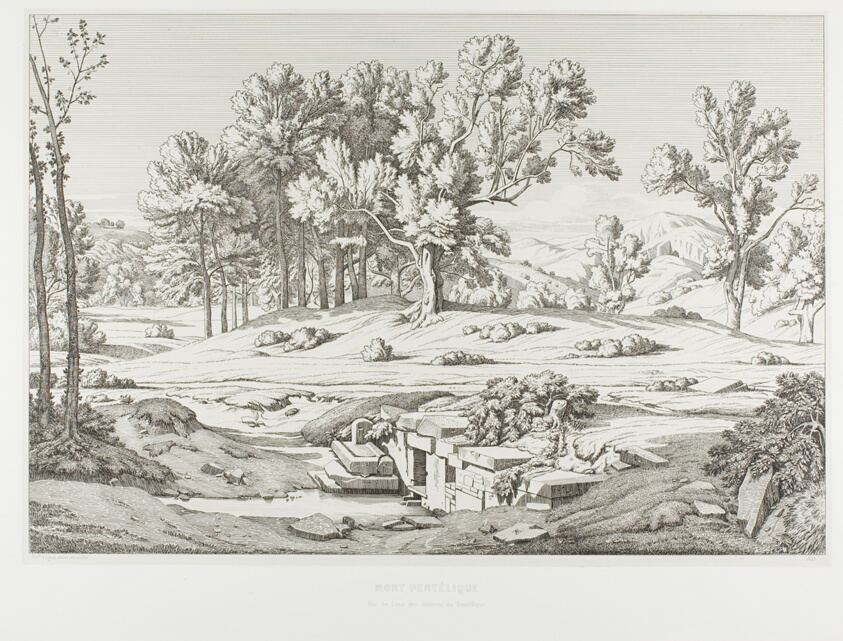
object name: Print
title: View of One of the Springs of Mount Pentéli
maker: Théodore Caruelle d'Aligny; French, 1798-1871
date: 1845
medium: Etching on ivory China paper, laid down on white wove paper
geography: France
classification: etching; print; prints and drawing